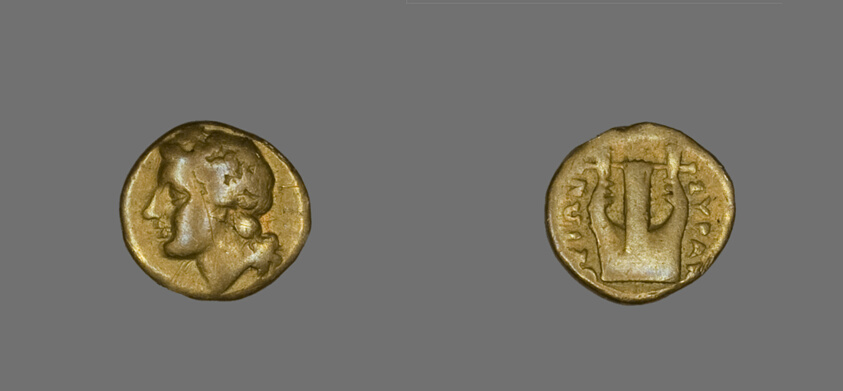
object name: Coin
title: Coin Depicting the God Apollo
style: greek, ancient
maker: Greek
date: about 357-353 BCE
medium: Electrum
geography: Greece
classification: coin; ancient art; struck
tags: mythological figures, musical instruments, deities